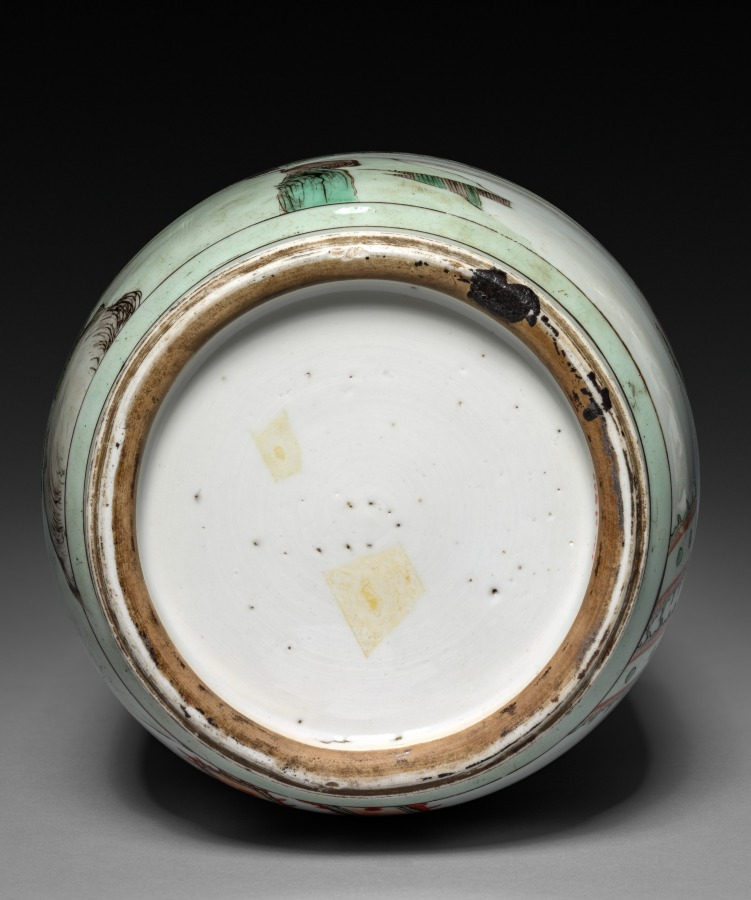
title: Vase with Decoration of Horsemen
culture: China, Qing dynasty (1644-1911), Kangxi reign (1662-1722)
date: 1622–1722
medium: porcelain with famille verte overglaze enamel decoration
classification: Ceramic